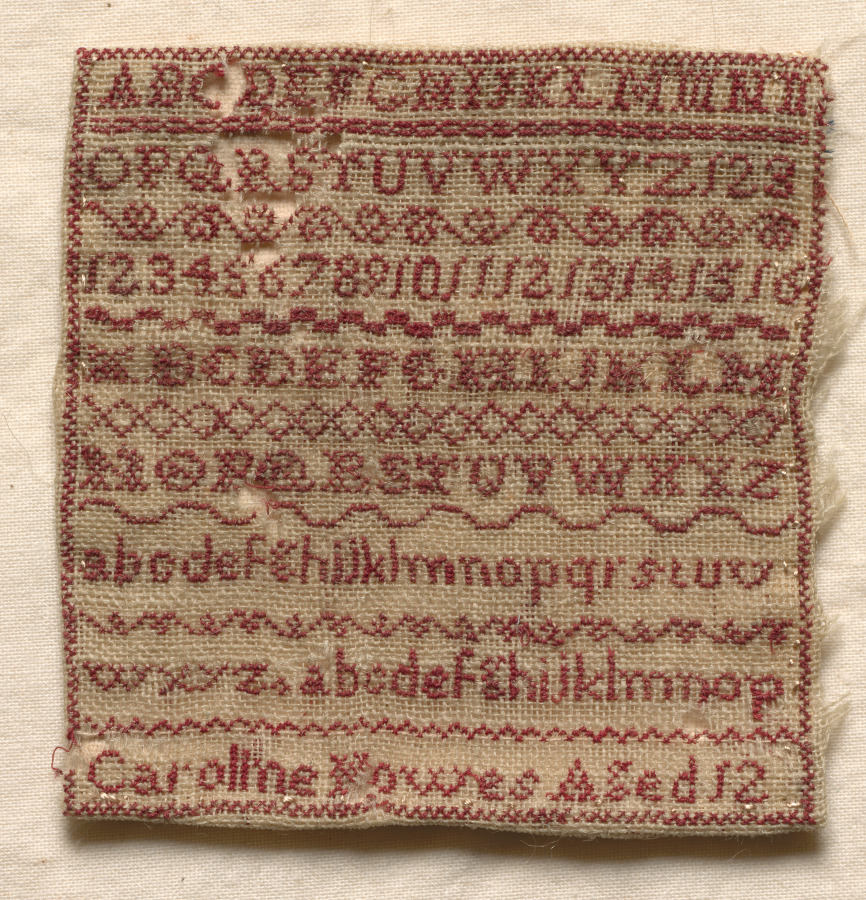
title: Sampler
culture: England, 19th century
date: 1800s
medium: embroidery; wool on woolen canvas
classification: Sampler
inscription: rows of alphabet and numerals in different scripts; signed: "Caroline Mowes Aged 12."